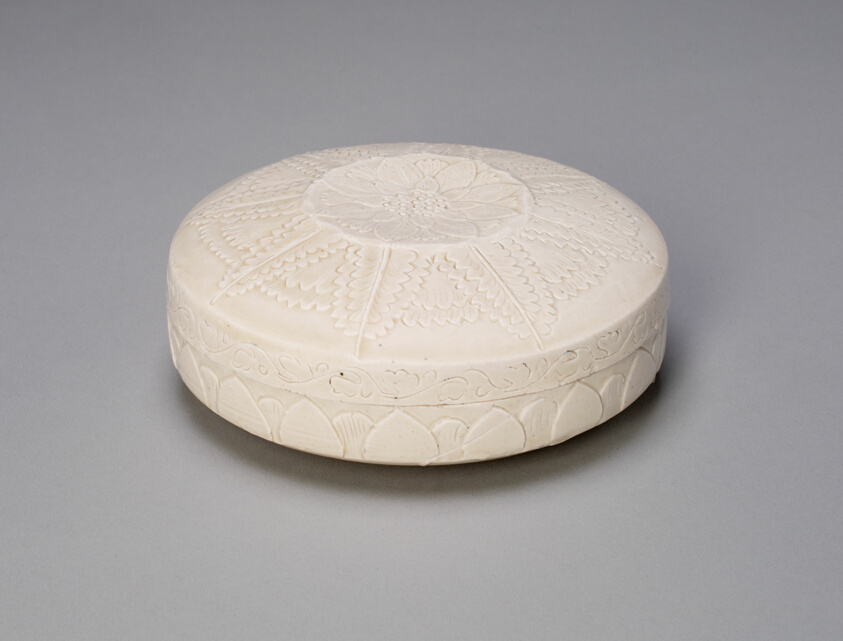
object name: Vessel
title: Covered Circular Box with Floral Medallion, Serrated Leaves, and Lotus Petals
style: Chinese (culture or style)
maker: China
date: Liao dynasty (907–1124), 10th century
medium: Porcelain with underglaze molded carved decoration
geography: China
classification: porcelain; asian art; ceramics; vessel